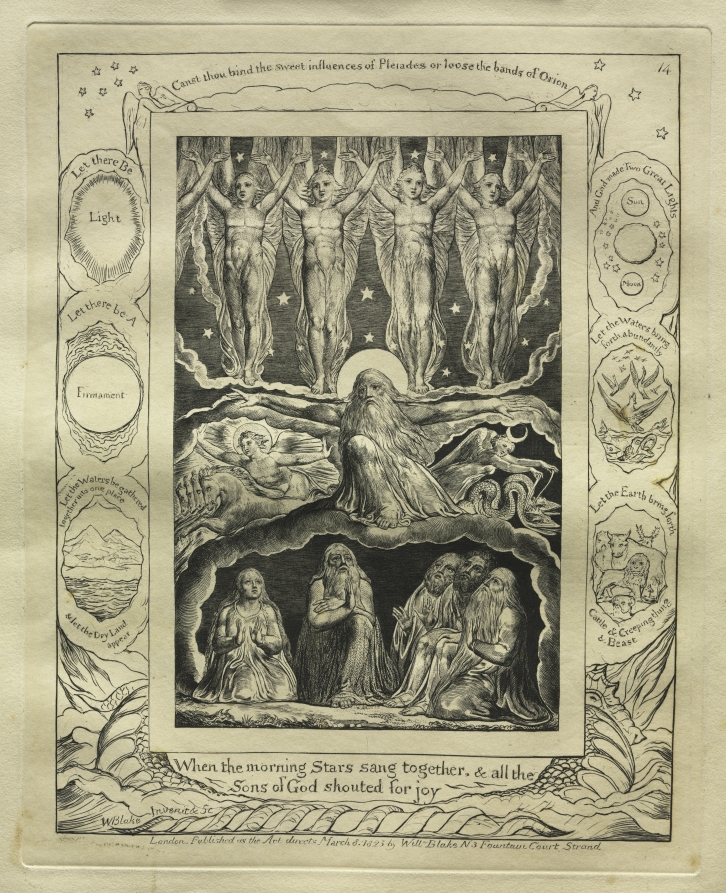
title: The Book of Job: Pl. 14, When the morning Stars sang together, and all the / Sons of God shouted for joy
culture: England, 19th century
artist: William Blake (British, 1757–1827)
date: 1825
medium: engraving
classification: Print